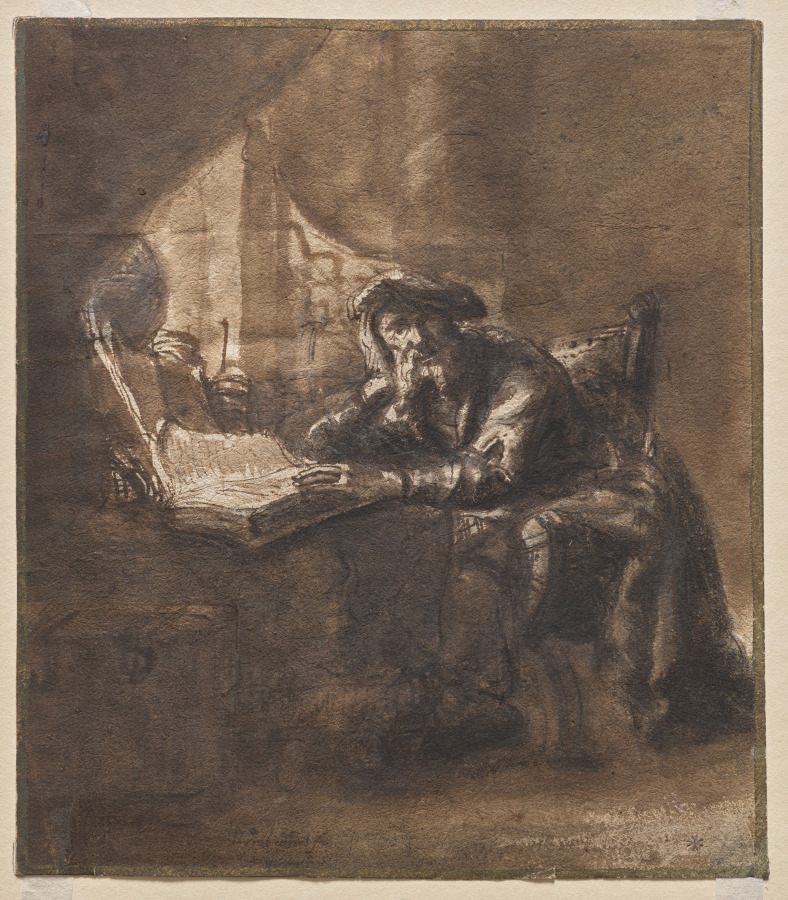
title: An Old Man Seated at a Table, His Head Resting on His Right Hand (recto)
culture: Netherlands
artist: Ferdinand Bol (Dutch, 1616–1680)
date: c. 1630s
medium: Pen and brown ink, brown wash, black ink framing lines (recto)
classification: Drawing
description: Ferdinand Bol was one of the most prominent pupils and followers of Rembrandt van Rijn, for whom drawing played a central role in his workshop practice and teaching. This image of a man within a darkened interior before a window—perhaps a scholar or philosopher—is similar to compositions of saints as well as portraits that Rembrandt made in the 1630s and 1640s. Bol was quite interested in the theme, portraying similar figures in at least two paintings, ten drawings, and four etchings. Like Rembrandt, he employed an expressive but controlled use of ink wash, emphasizing the psychological interiority of the sitter with dramatic shading. The verso (back) of the drawing features a quick sketch by Bol after another of Rembrandt’s compositions, Tobit Healing his Father’s Blindness, 1640–45, held today in the CMA’s collection (1969.69).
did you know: Ferdinand Bol’s subtle and controlled use of ink wash reveals a large trunk on the floor, while retaining bright highlights on the figure, book, and globe on the windowsill.